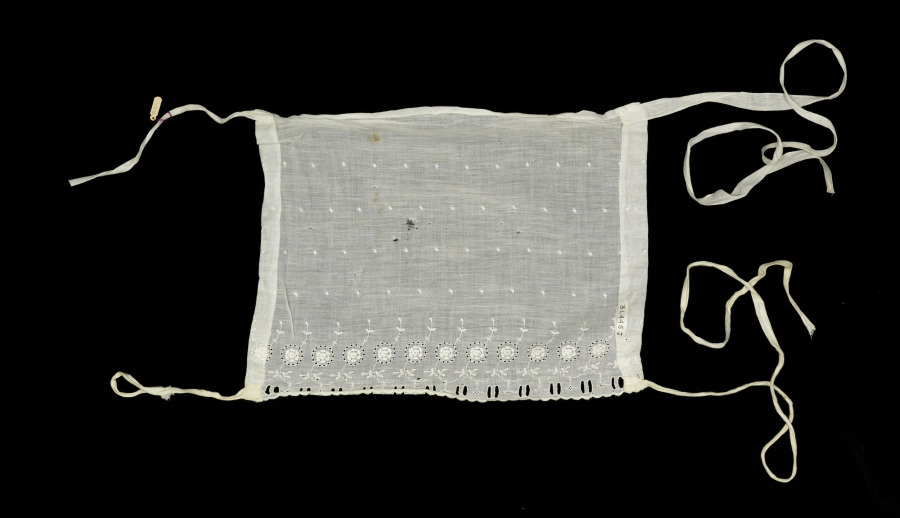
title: Woman's Costume (Chemisette)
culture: Italy, Sicily, 19th century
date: 1800s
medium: plain weave cotton (white) with embroidery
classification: Garment